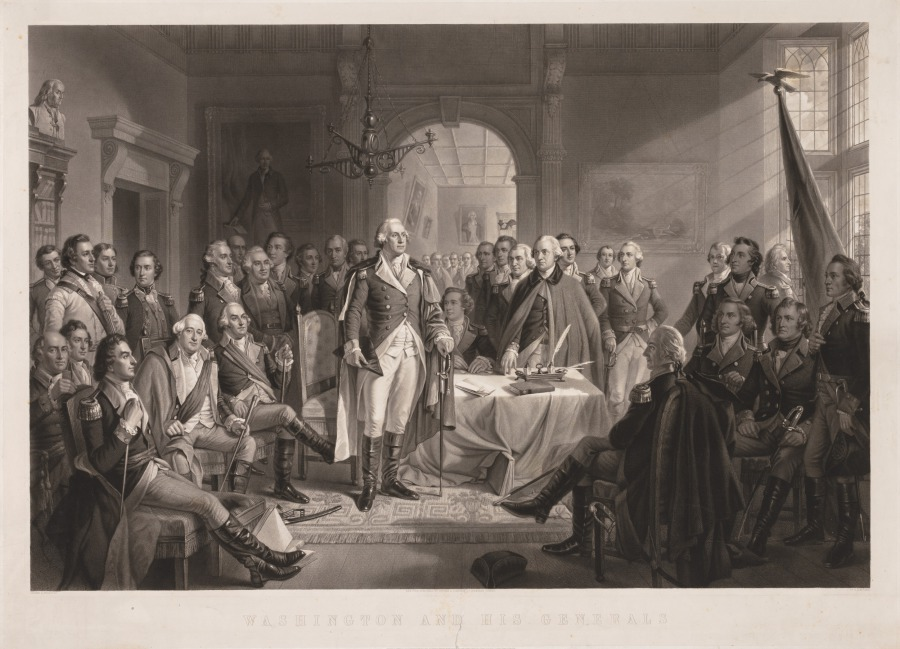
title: Washington and His Generals with Key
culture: America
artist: Alexander Hay Ritchie (American, 1822–1895)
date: 1856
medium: engraving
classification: Print